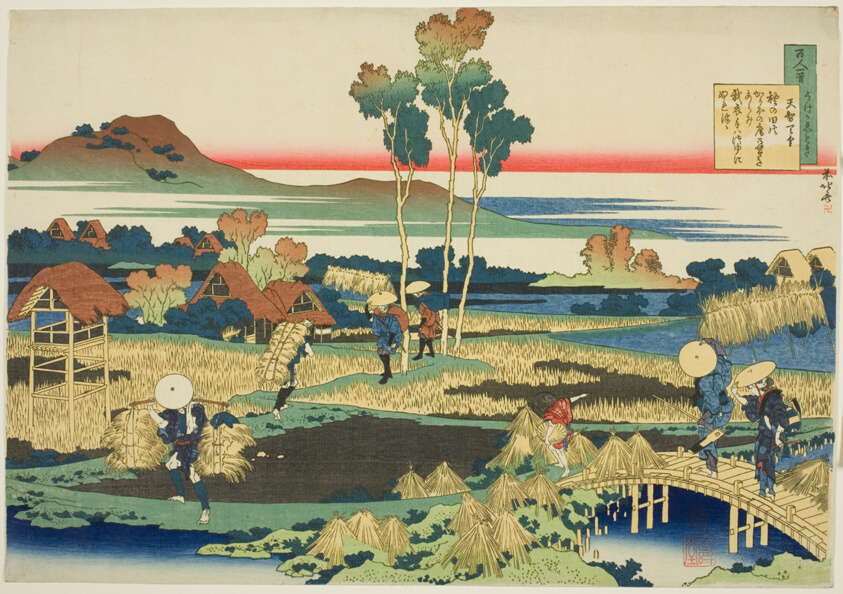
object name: Print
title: Tenji Tenno (The Emperor Tenji), first poet in the series One Hundred Poems by One Hundred Poets Explained by the Nurse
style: Japanese (culture or style)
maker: Katsushika Hokusai 葛飾 北斎; Japanese, 1760-1849; Publisher: Hibino Yohachi; Japanese, unknown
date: c. 1835/36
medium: Color woodblock print; yoko oban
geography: Japan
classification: woodblock print; print; asian art